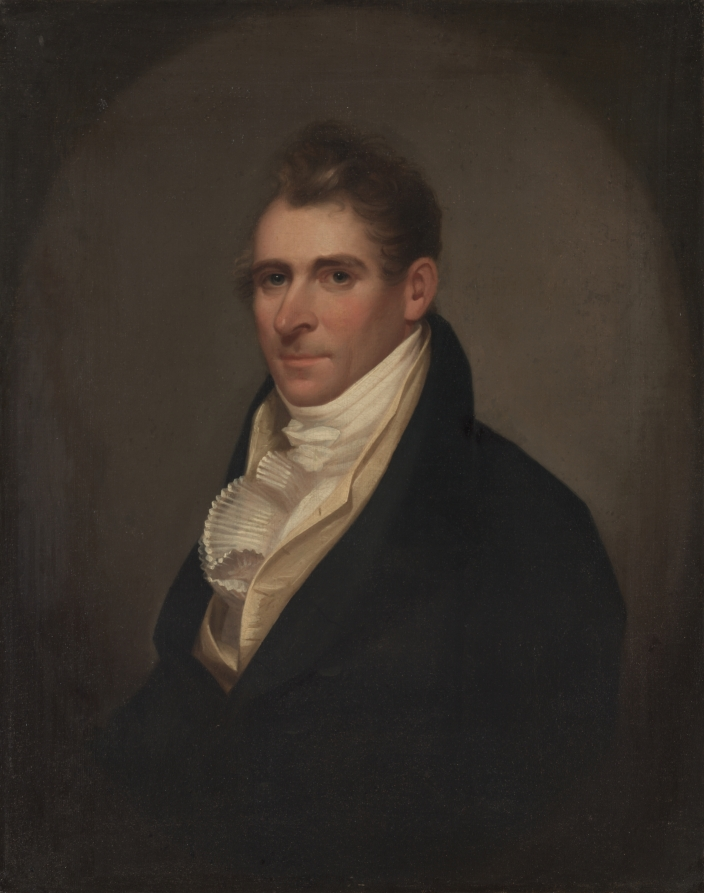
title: John Scoville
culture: America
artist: Ezra Ames (American, 1768–1836)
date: c. 1810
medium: oil on canvas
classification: Painting